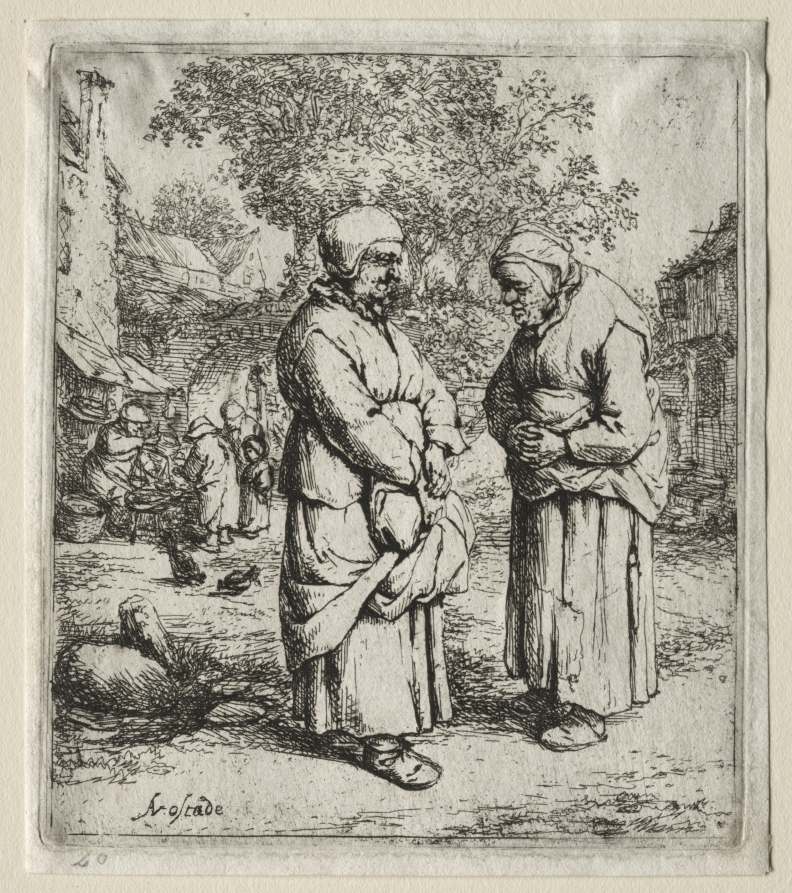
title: The Two Gossips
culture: Netherlands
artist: Adriaen van Ostade (Dutch, 1610–1684)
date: c. 1648–54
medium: etching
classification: Print